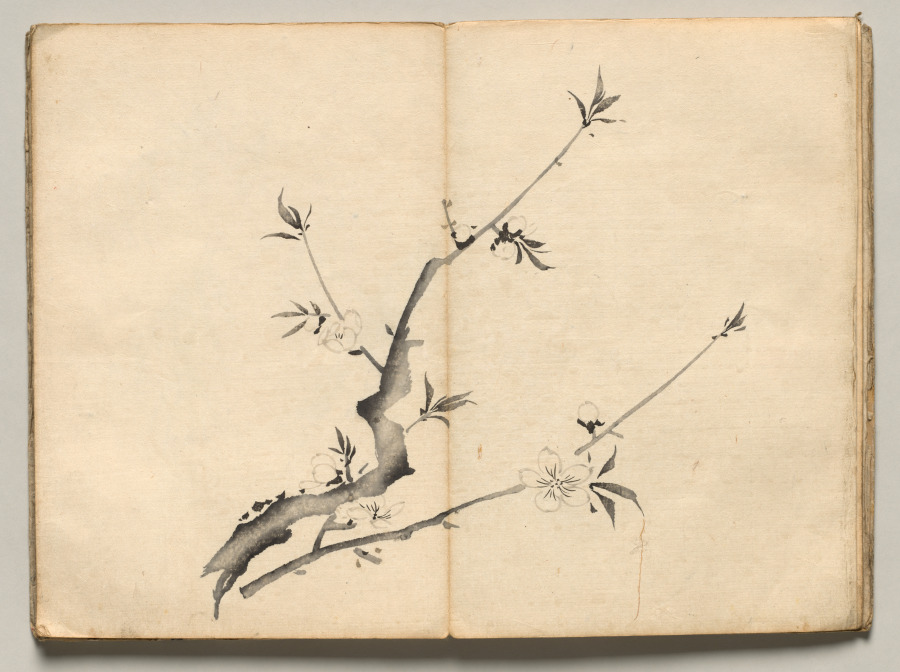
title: Cherry from Ōkyo Picture Book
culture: Japan, Edo period (1615–1868)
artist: after Maruyama Ōkyo (Japanese, 1733–1795)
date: 1850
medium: accordion-style woodblock printed folding-book; ink and color on paper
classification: Bound Volume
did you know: This impression of a book of woodblock-printed designs is missing a spread that depicts a crane.